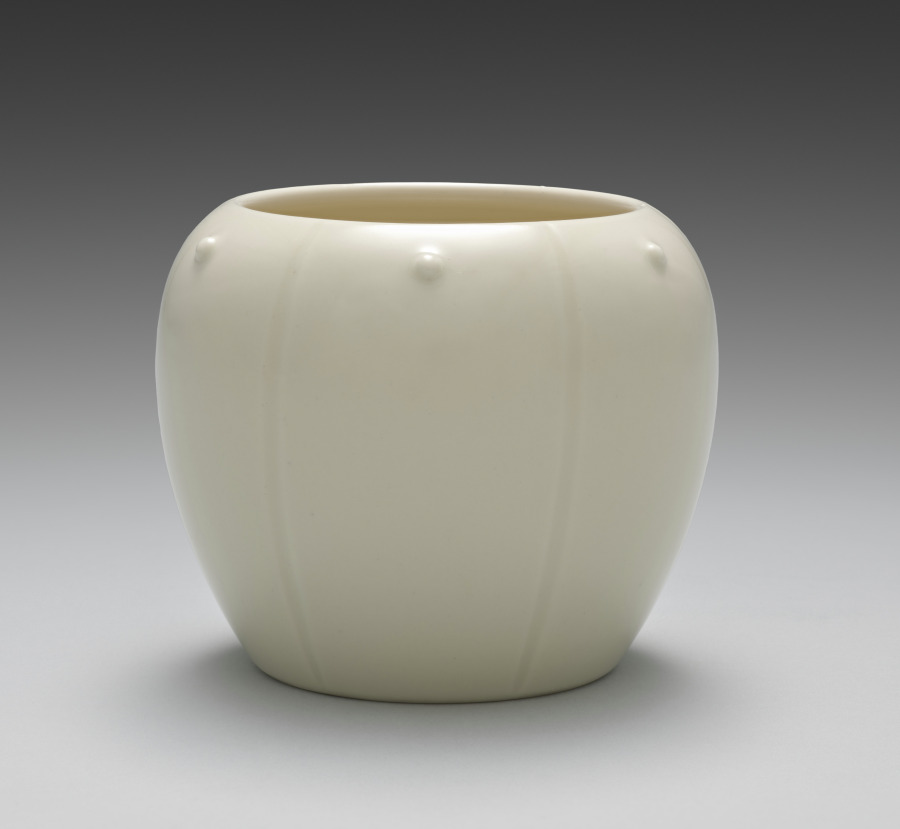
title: Container from Lit Charcoal and Ash Containers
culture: Japan, Meiji period (1868–1912)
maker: Seifū Yohei III (Japanese, 1851–1914)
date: 1893–1914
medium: One from a set of four containers; porcelain with molded design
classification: Ceramic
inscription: 清風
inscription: The storage box for this set is inscribed and impressed with seals.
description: The box lid for these six-lobed lit charcoal and ash containers, or hiire, identifies them as kōhakuji, another of Yohei III’s translucent cream colors over ivory clay bodies. One might translate the name as “lustrous pearl[–glazed ivory] porcelain.” A hiire was filled with ash with burnt coals at the center so that embers and tobacco ash could be discarded safely during a gathering. Each of the lobes on the containers has a round protrusion set below the rim. The studlike pattern is called ruiza. The term is also used to describe the pattern that rings the shoulder of some flower vases or metal kettles used in chanoyu.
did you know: The Seifu studio generally followed the standard practice in Japan for identifying the artist and object in box inscriptions.